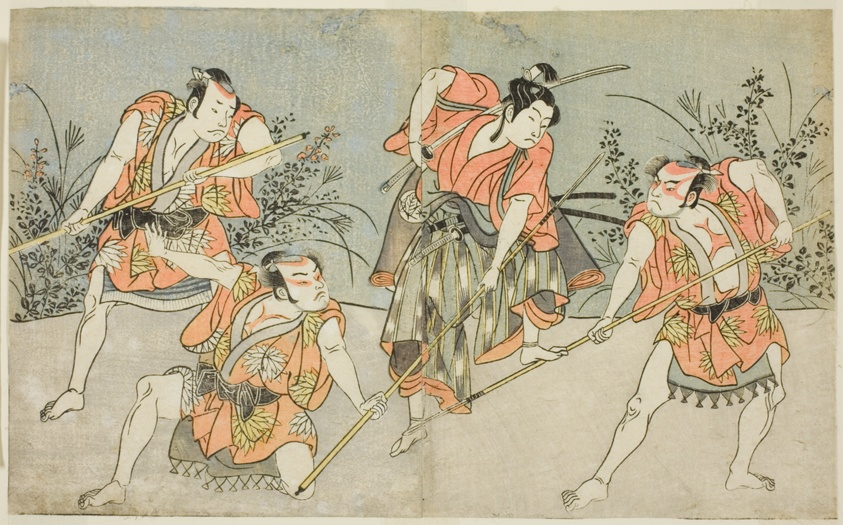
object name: Print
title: The Actors Nakamura Kashiwagi as a Wakashu (second from right), and Three Unidentified Actors as Yakko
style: Japanese (culture or style)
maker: Katsukawa Shunsho 勝川 春章; Japanese, 1726-1792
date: c. 1772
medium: Color woodblock print; from the illustrated book Yakusha Kuni no Hana (Prominent Actors of Japan)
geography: Japan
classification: woodblock print; print; asian art